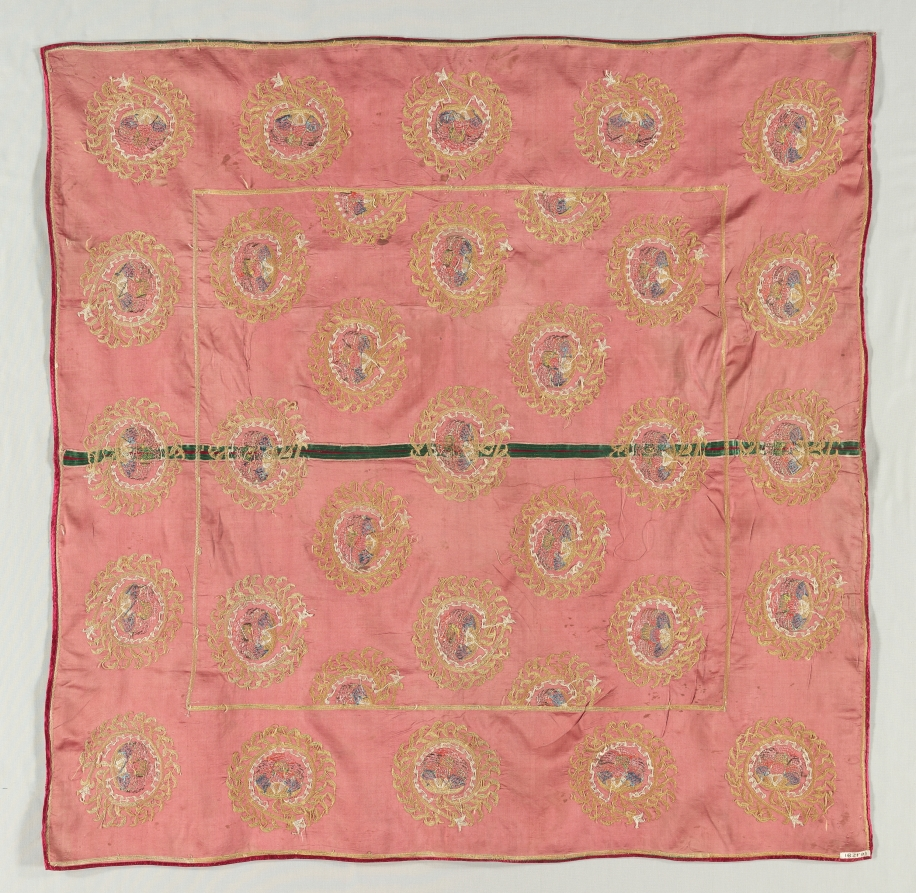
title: Embroidered Square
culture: Turkey, 19th century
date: 19th century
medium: embroidery: silk and gold and silver filé on silk ground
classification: Embroidery